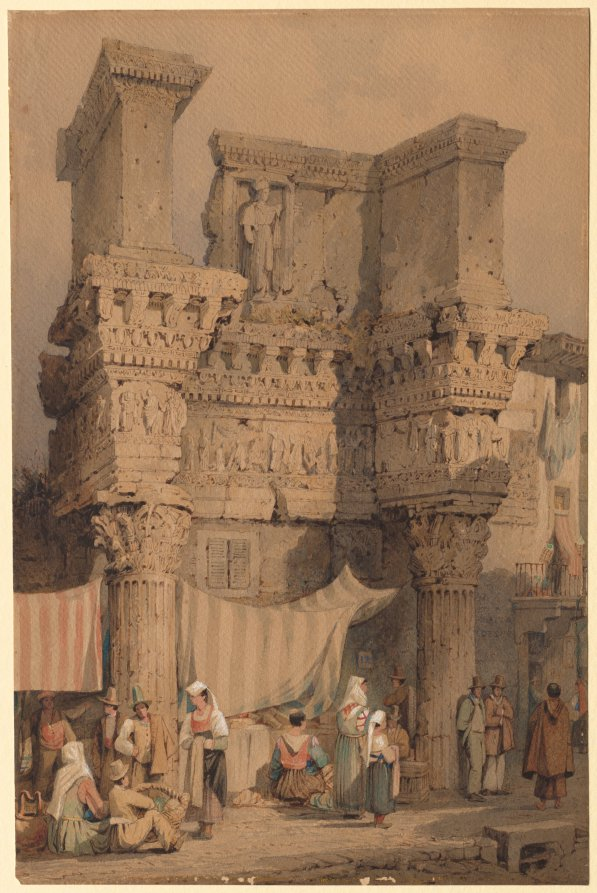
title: The Forum of Nerva, Rome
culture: England, 19th century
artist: Samuel Prout (British, 1783–1852)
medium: watercolor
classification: Drawing